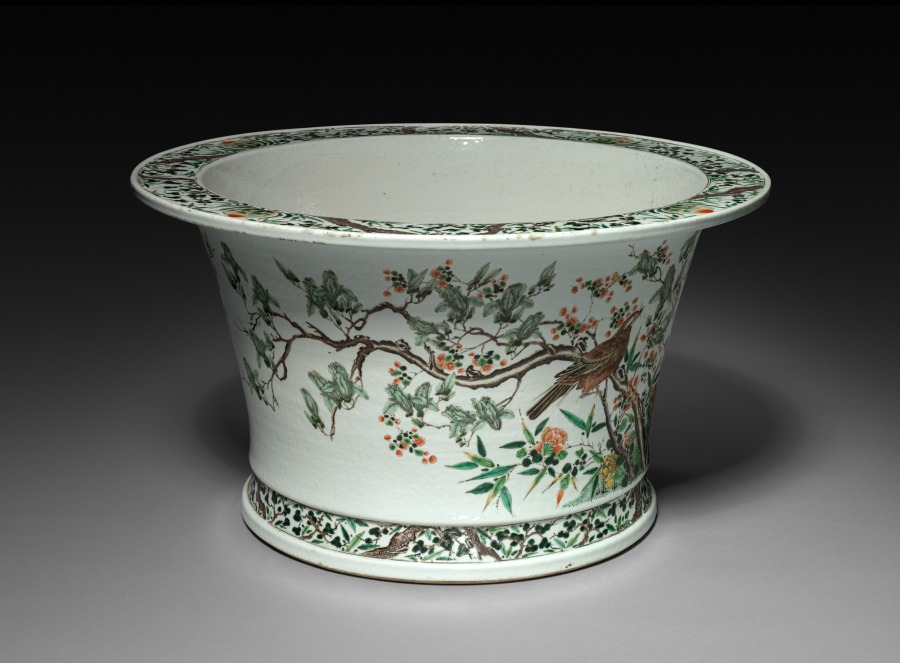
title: Jardiniere with Birds on Flowering Branches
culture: China, Jiangxi Province, Jingdezhen kilns, Qing dynasty (1644–1911), Kangxi reign (1661–1722)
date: 1662–1722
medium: porcelain with famille verte overglaze enamel decoration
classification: Ceramic